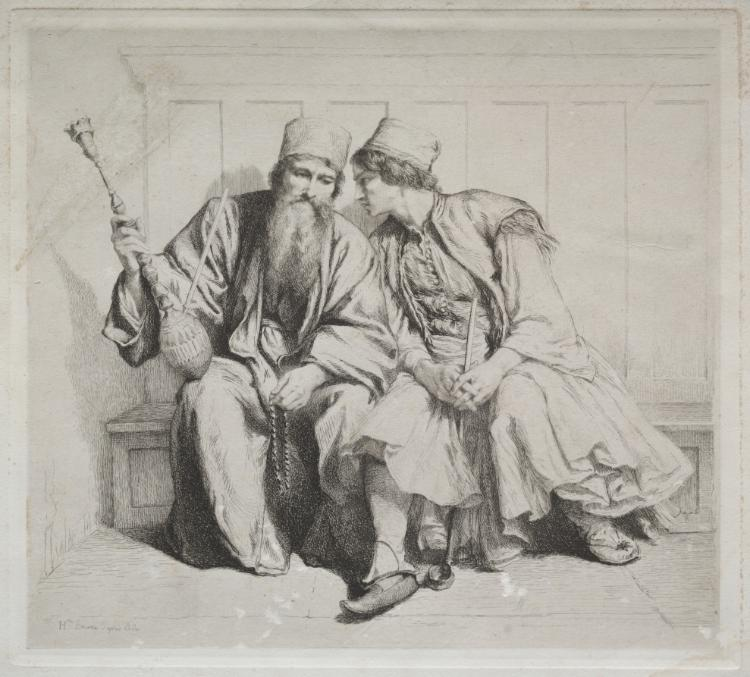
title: Young Greek Man in Conversation with a Priest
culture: France, 19th century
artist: Henriette Brown (French, 1829–1901)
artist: after Alexandre Bida (French, 1823–1895)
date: 2nd half of 1800s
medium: etching with chine collé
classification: Print